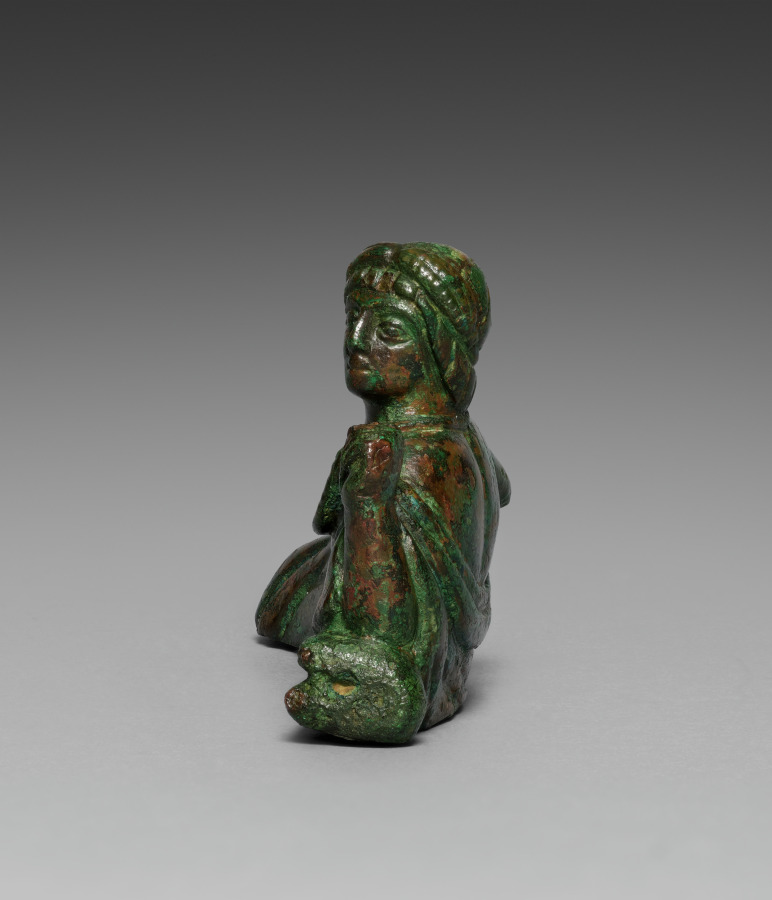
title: Vessel Ornament of Banqueter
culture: Etruscan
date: probably 400–375 BCE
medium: bronze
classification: Sculpture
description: This bronze banqueter figurine was one of six once adorning the rim of a large basin, now lost. Cast in molds with individualized details, most have grooves on their underside to attach to the basin. Minute traces of gilding remain on areas of clothing and skin (mostly visible only under magnification), suggesting that they may have been completely gilded. Two handles in the form of hippocampi, horses with serpentine tails, also belonged to the basin and are now displayed at the Michael C. Carlos Museum at Emory University. The basin may have been used to hold liquid for a banquet, or was perhaps funerary. This banqueter tilts his head toward his left hand, which may have once held an object, now lost. His right arm rests on his hip. Unlike the other banqueters, this figurine does not have exposed feet and his body curves slightly when viewed from above. This suggests that this figurine may have been made for a different initial use before being added to this set.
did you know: The Etruscan banquet shared similarities with the Greek symposium where guests reclined and drank wine.